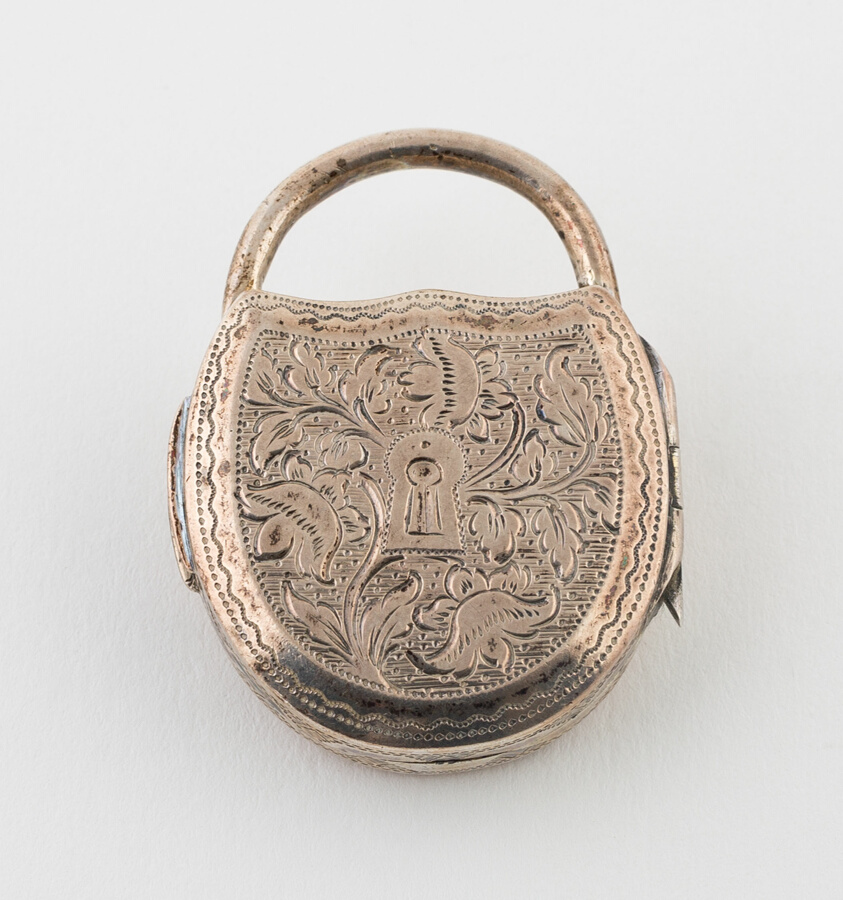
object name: Metalwork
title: Vinaigrette in the Form of a Padlock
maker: John Lawrence and Company; Birmingham, England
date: 1818/19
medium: Silver and silver gilt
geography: Birmingham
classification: container for personal use; vinaigrette (container for health care); european decorative arts; metalwork; silver; decorative object/ornament